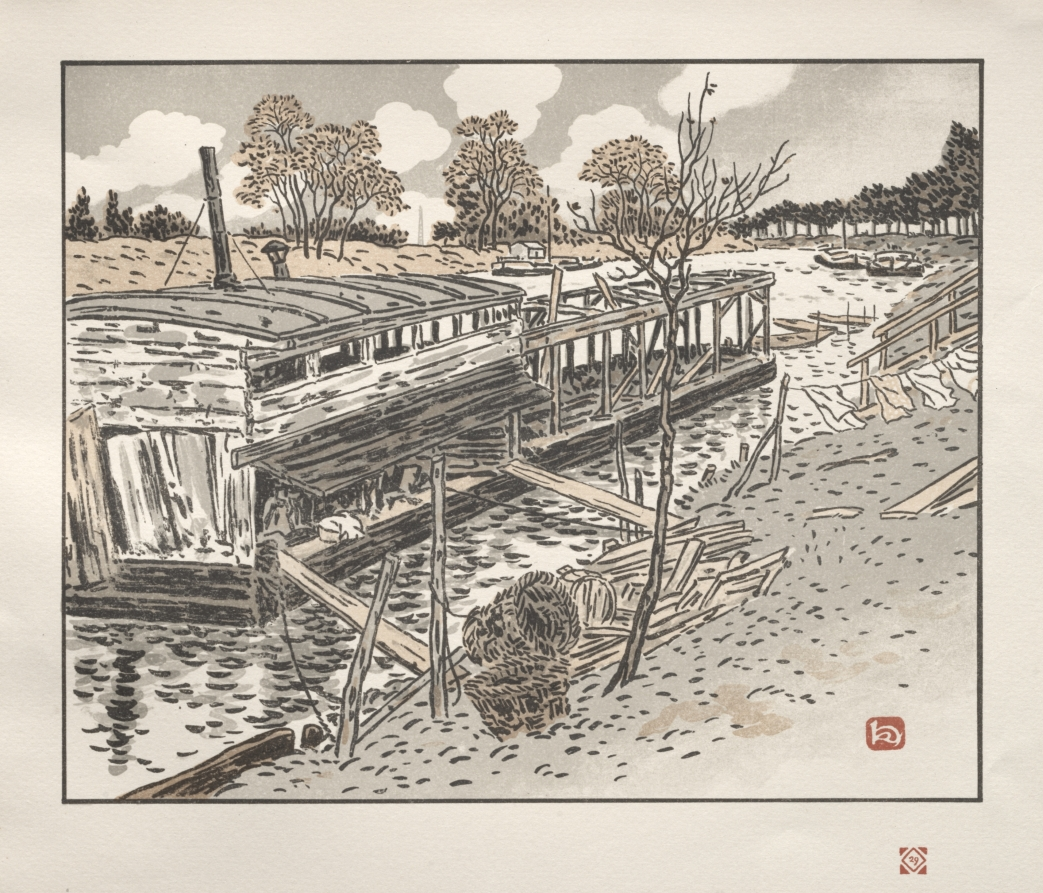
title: From Bas-Meudon, Old Lavoir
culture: France, early 20th century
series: Thirty-Six Views of the Eiffel Tower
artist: Henri Rivière (French, 1864–1951)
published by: Printed by Verneau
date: 1902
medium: color lithograph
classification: Print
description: A close friend of Edgar Degas’s and a prolific printmaker, Henri Rivière set out to fully represent the Paris of his day through a series of 36 widely varying perspectives. Each image was united by the presence of the distinctive Eiffel Tower. The city’s laundry industry features throughout the prints, which centers on a weathered wash boat in Bas-Meudon, an industrial suburb both physically and mentally removed from Paris, barely visible in the distance.